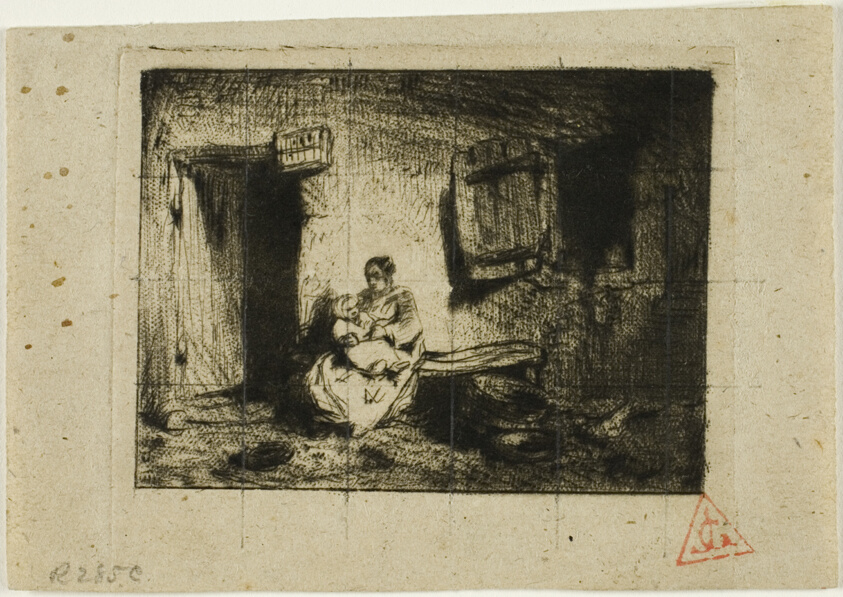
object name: Print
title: Nursemaid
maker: Charles Émile Jacque (French, 1813-1894)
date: 1843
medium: Drypoint and roulette on cream chine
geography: France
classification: drypoint; print; prints and drawing